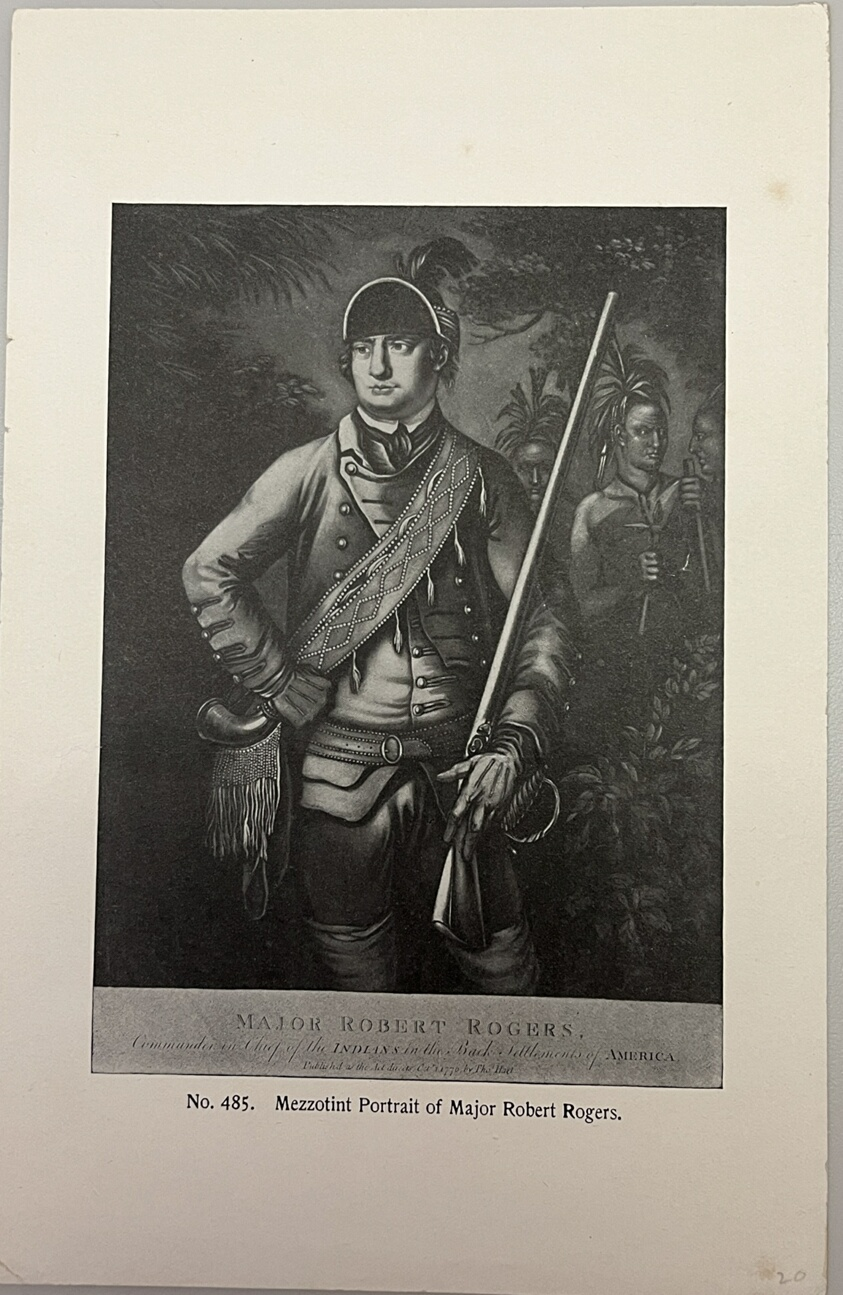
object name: Print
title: Major Robert Rogers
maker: Artist Unknown (Likely American or British, 19th century)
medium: Lithograph on paper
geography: United States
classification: reproduction; print; prints and drawing